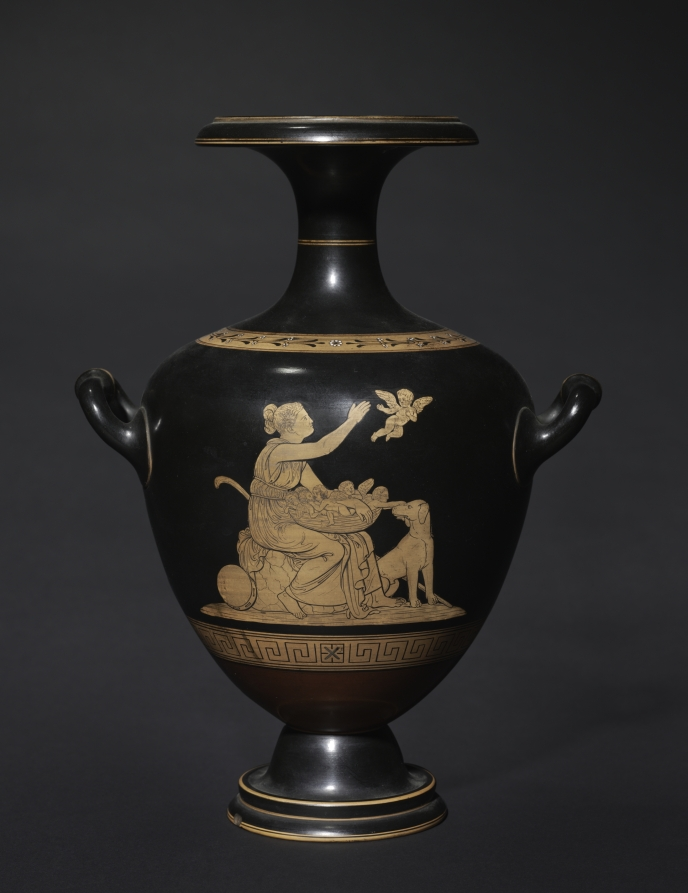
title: Vase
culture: Denmark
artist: Adolf Hjorth Lauritz (Danish, 1834–1912)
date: 1885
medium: terracotta with black and white transparent glaze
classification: Ceramic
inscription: stamped on bottom of base: "L. Hjorth/85."